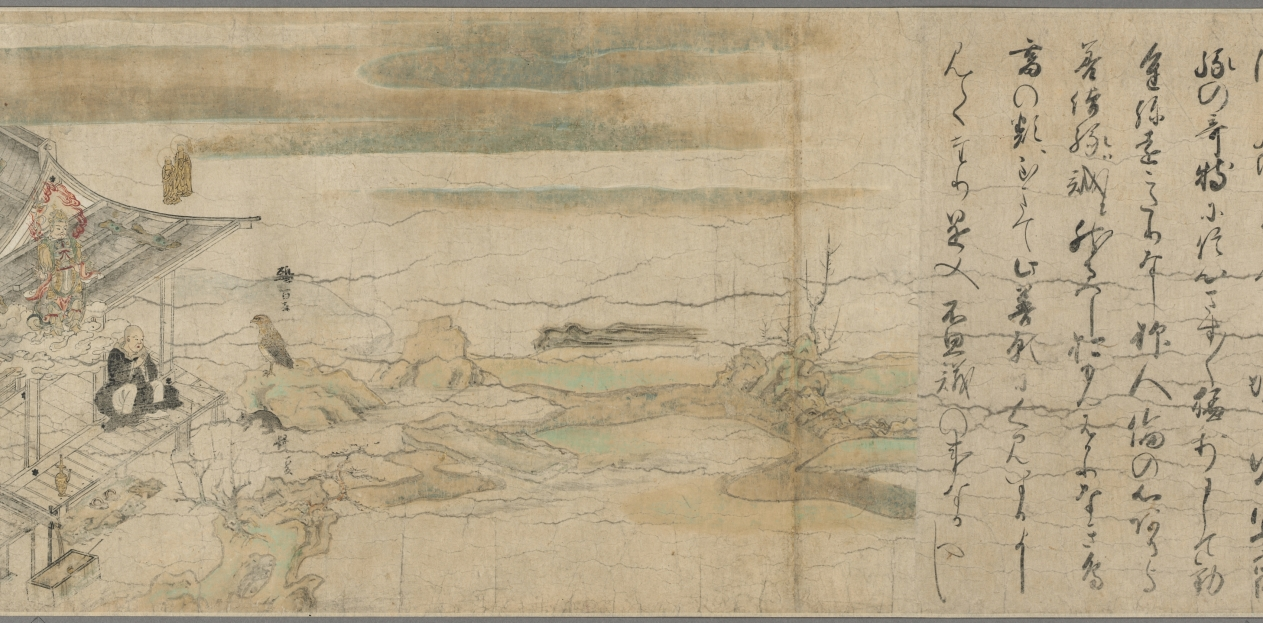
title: The Illustrated Miraculous Origins of the Yūzū Nenbutsu School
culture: Japan, Kamakura period (1185–1333)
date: early 1300s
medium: Handscroll; ink, color, and gold on paper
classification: Painting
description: This painting is the second of a set of two illustrated handscrolls. The first scroll depicts the biography of the Japanese Buddhist monk Ryōnin. This scroll begins with scenes of Ryōnin’s death and relates episodes illustrating the efficacy of following his teachings. Ryōnin asserted the total interconnectedness of all things and the spiritual benefit of chanting the name of the Buddha Amida for one another.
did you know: The other scroll from this two-scroll set belongs to the Art Institute of Chicago.